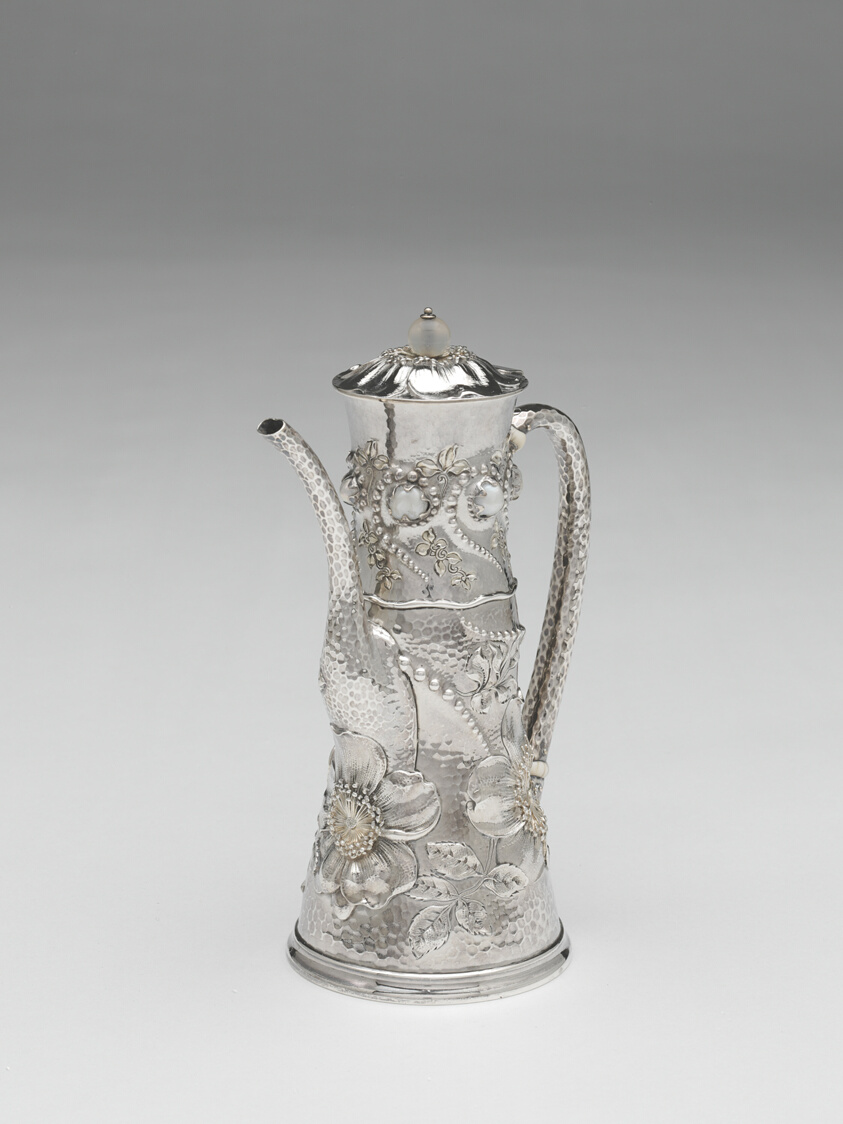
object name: Metalwork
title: Coffee Pot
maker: Design attributed to Charles Osborne (American, 1847–1920); Tiffany and Company (American, founded 1837); New York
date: 1881–89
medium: Silver, pearls, chalcedony, and ivory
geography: New York City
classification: coffeepot; silver; american decorative arts; american arts; decorative arts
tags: dining, drinking